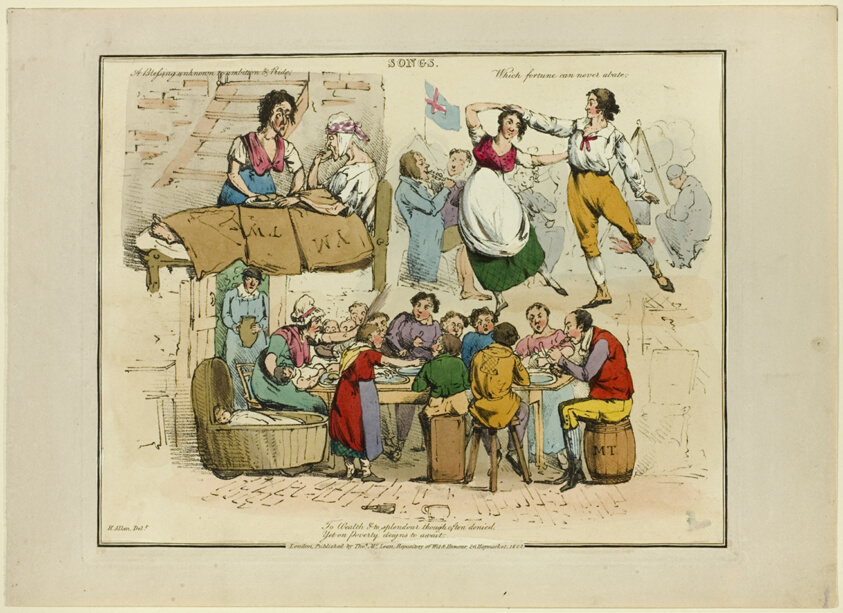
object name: Print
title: Plate from Illustrations to Popular Songs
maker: Henry Alken (English, 1785-1851); published by Thomas McLean (English, active 1790-1860)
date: 1822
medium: Soft ground etching with hand-coloring and aquatint on paper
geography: England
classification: etching; print; prints and drawing